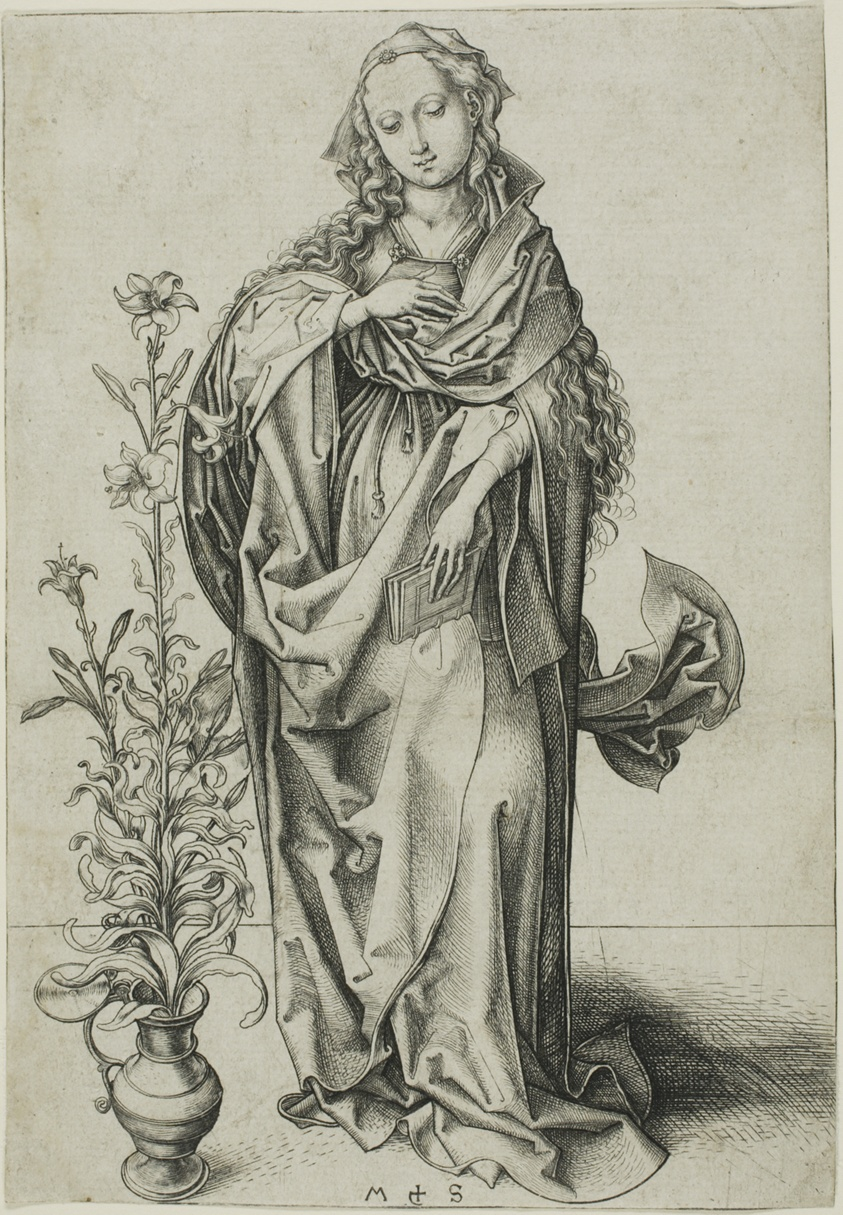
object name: Print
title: The Virgin of the Annunciation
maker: Martin Schongauer (German, c. 1430/50-1491)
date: 1470/75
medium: Engraving in black on ivory laid paper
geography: Germany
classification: engraving; print; prints and drawing